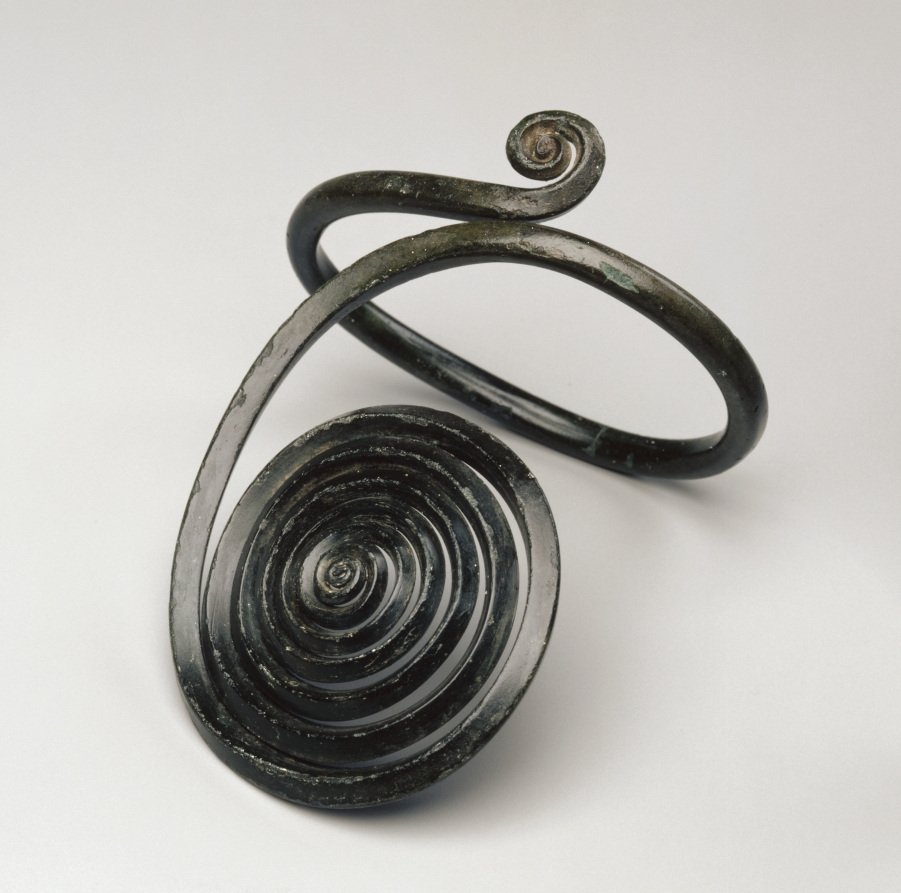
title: Spiral Armilla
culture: Central Europe, Bronze Age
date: c. 1500 BCE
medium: bronze, wrought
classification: Metalwork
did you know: This armilla or arm ornament has a ridge along the spine, ending in a large spiral at one end.